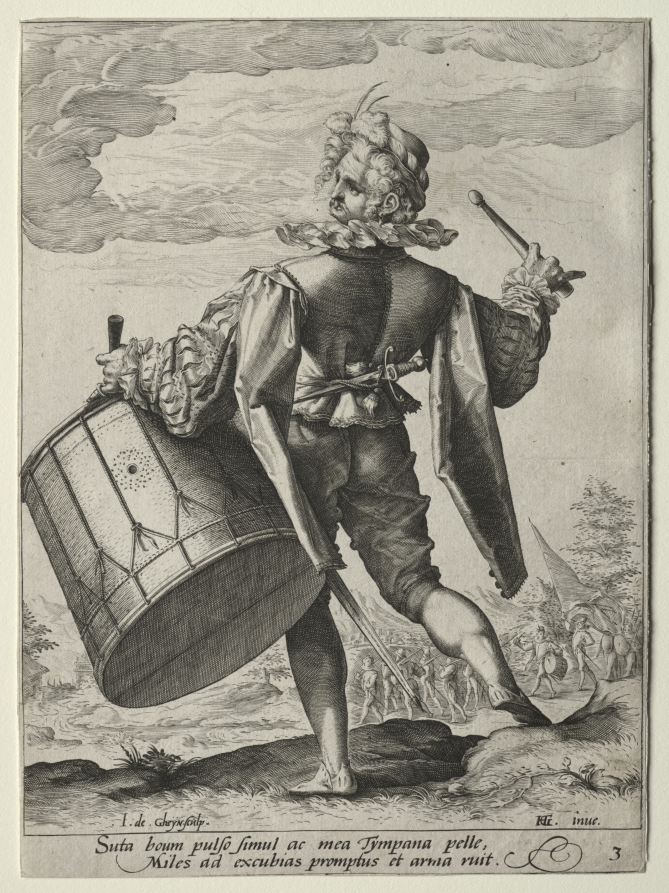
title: Drummer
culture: Netherlands, 16th century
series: Soldiers and Officers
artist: Jacob de Gheyn II (Netherlandish, 1565–1629)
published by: Hendrick Goltzius (Dutch, 1558–1617)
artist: after Hendrick Goltzius (Dutch, 1558–1617)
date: 1587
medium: engraving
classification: Print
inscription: lower left, in plate: .I. de. Gheyn.scup. ; lower right, in plate: HG.[in monogram] inve. ; across bottom, in plate: Suta boum pulso simul ac mea Tympana pelle, / Miles ad excubias promptus et arma ruit. ; lower right, in plate: 3 ; verso, lower right, in graphite: 8